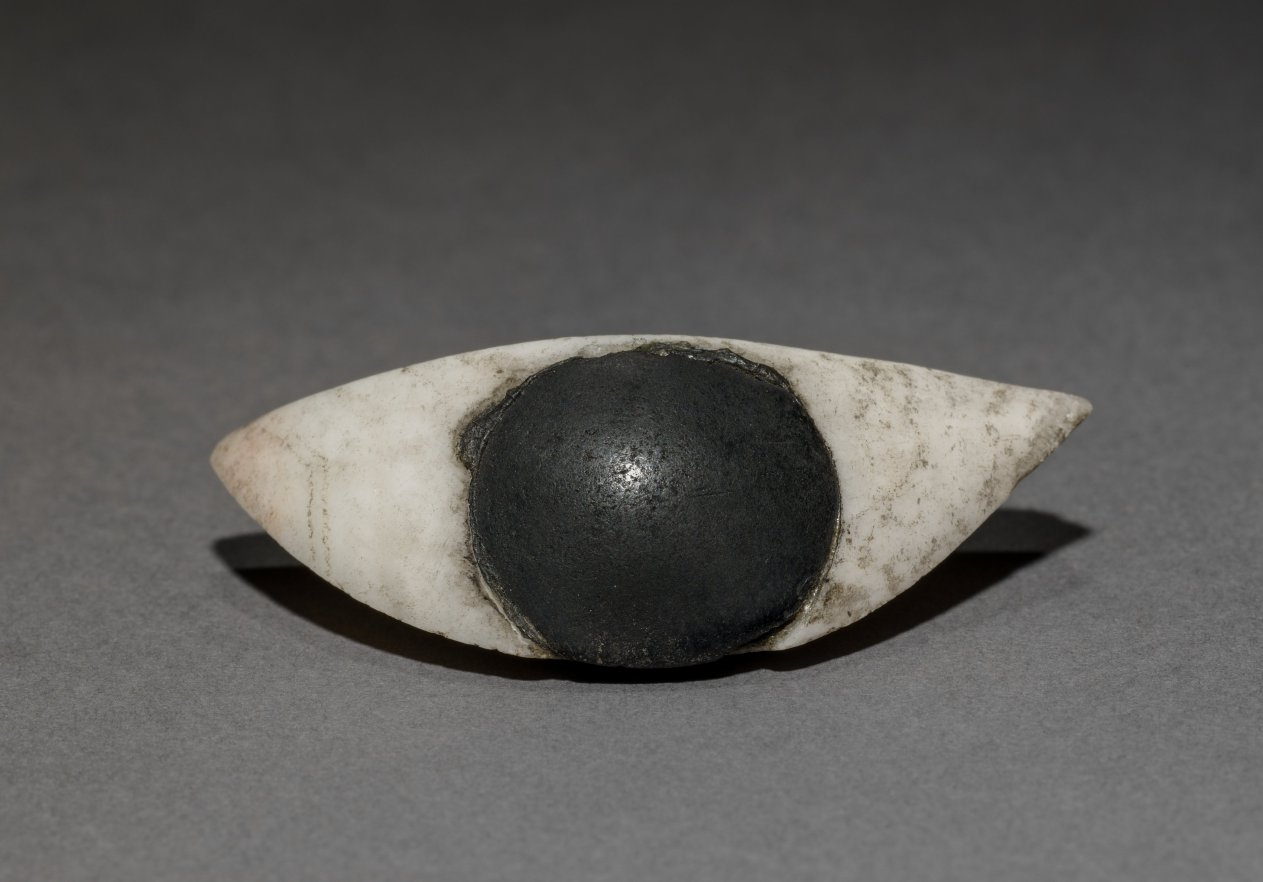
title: Inlay Eye (one of a pair)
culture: Egypt, Haraga, cemetery E, tomb 614, excavated in 1914, Middle Kingdom (2040–1648 BCE), Dynasty 12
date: 1980–1801 BCE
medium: travertine and obsidian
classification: Funerary Equipment